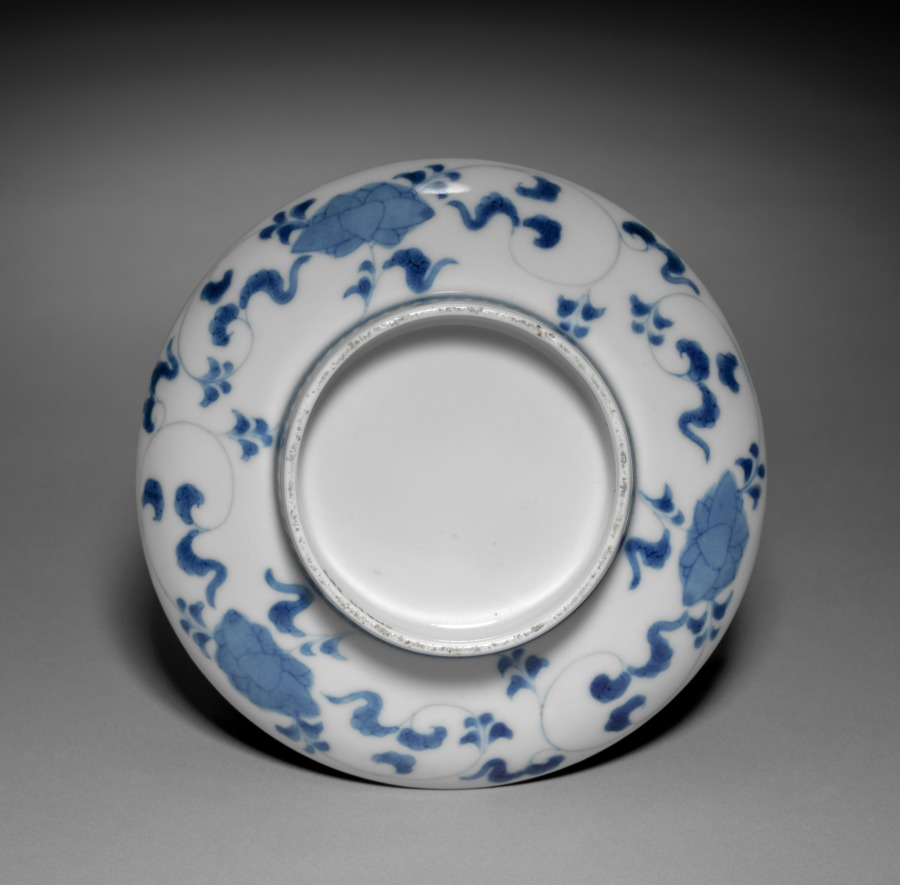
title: Dish with Brocade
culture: Japan, Edo period (1615–1868)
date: late 1600s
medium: Porcelain with underglaze blue and overglaze enamel (Hizen ware, Nabeshima type)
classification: Ceramic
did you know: Designs on Nabeshima ware, like this dish, were often inspired by Japanese textiles.